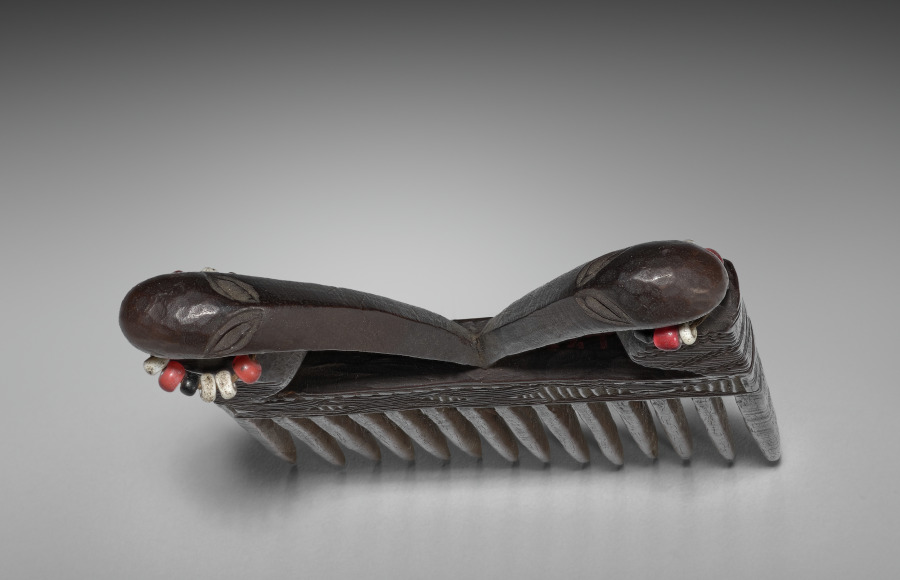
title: Comb (cisakulo)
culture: Africa, Central Africa, Angola, or Democratic Republic of Congo, Chokwe-style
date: mid- to late 1800s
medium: Wood, glass beads, and natural fibers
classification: Jewelry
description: Chokwe women and men inserted finely decorated combs and pins in their hair to signal rank and wealth. Here, as among neighboring peoples, hairstyles reflected changing trends across place and over time. This comb's wooden material and sculptural top made it of a higher value than simple examples made from metal or cane. Its wide teeth were practical, securing elements of a hairstyle in place. The long-beaked ngungu birds with beaded necklaces were a well-known symbol of chiefly power. In addition to being a sign of beauty and good health, a well-styled hairdo also suggests that the wearer relies on the help of others in its creation. Combs were often gifted to women by admirers or husbands to mark important life events. This comb entered the Cleveland Museum of Art's collection in 1915, one year before the museum opened its doors.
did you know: The double birds on this comb are the ngungu, a kind of hornbill linked to hunting and the related power of leaders. They were considered a good omen, and served as mediators between the earthly world and the spiritual one.